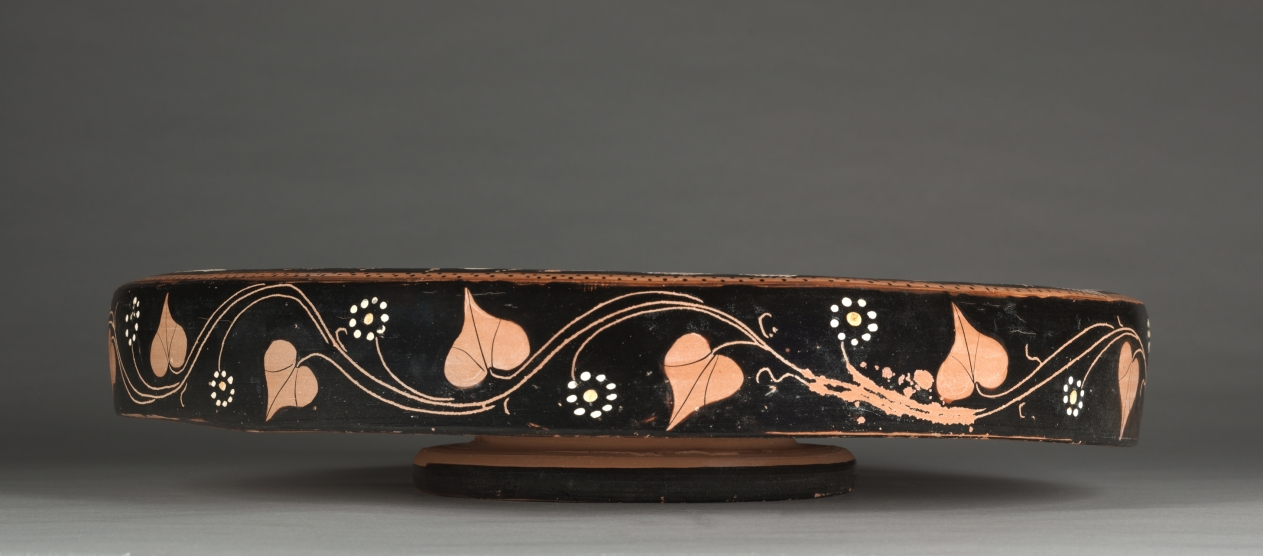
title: Red-Figure Fish Plate: Octopi, Mullet, Bream, Shellfish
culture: South Italian, Paestan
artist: attributed to Asteas/Python Workshop (South Italian, Paestan, active c. 360–320 BCE)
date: c. 340–330 BCE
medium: ceramic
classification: Ceramic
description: Although first developed in Athens, red-figure fish plates became especially popular in South Italy and Sicily in the 300s BC. All feature a short foot and a small central depression, but those produced in the workshop of Asteas and Python, like this one, are the largest and most ornate. Archaeologists have closely studied the fish and other sea creatures represented, identifying many of them with species still found (and eaten) in the Mediterranean; included here are octopi, mullet, bream, and various shellfish.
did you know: Perfect for serving seafood, this plate features images of sea creatures and a central well for dipping or collecting juices.